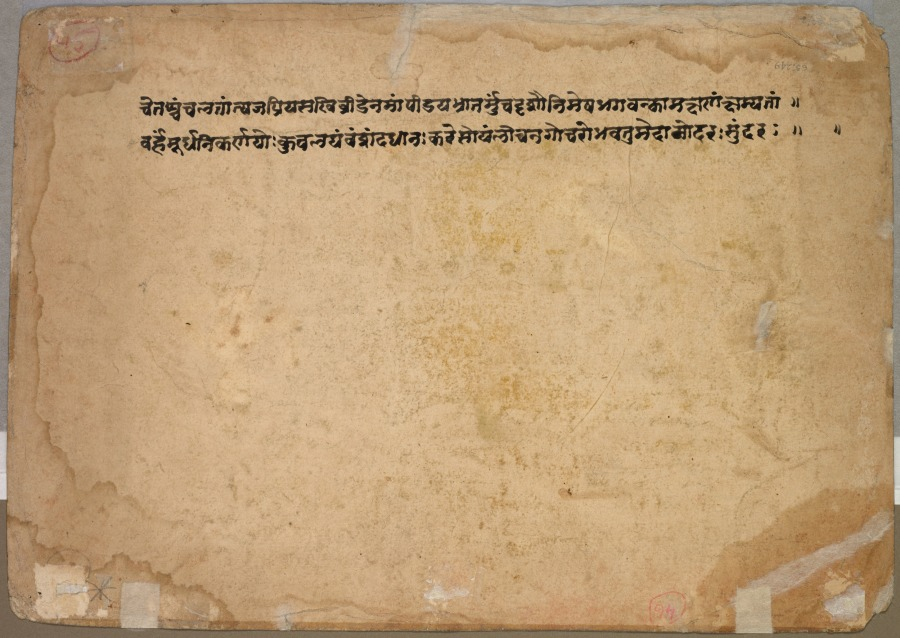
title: The Approach of Krishna. Page from a Rasamanjari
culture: Northern India, Pahari kingdoms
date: c. 1660–70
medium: Gum tempera, ink, silver, gold, and beetle wings on paper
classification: Painting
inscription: "Friend give up your waywardness of mind. O dear friend do not torture me with your shyness. For a moment, the lord Kama forgive me, be steadfast in your gaze. May the handsome Krishna wearing peacock feathers on his head, putting lotus in his ears and holding the flute on his hand reveal himself to me now." (translated by Moti Chandra and Anand Krishna)" Inscriptions: (on left border) number 135; (above) sakshat darshana -"Seeing the lover face to face"; (reverse) Sanskrit text - see W. G. Archer, 1973, 1: 39.